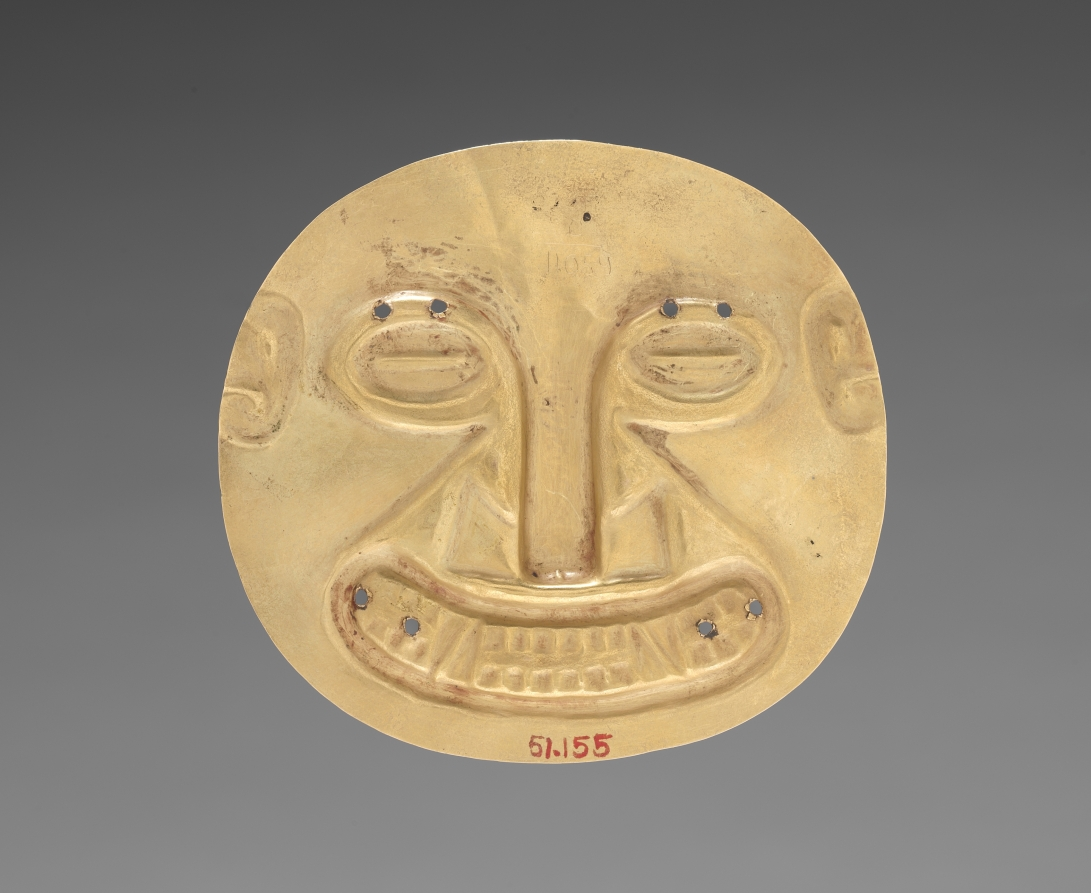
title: Ornament from Sitio Conte: Small Plaque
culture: Panama, Conte style, 5th - 10th century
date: c. 400–500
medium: hammered gold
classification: Metalwork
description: Harvard archaeologists excavated this ornament from Grave 32 at Sitio Conte, a cemetery famous for its lavish graves of powerful chieftains. The warm gleam of gold linked rulers with the sun’s creative force.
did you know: This disk was excavated from a burial containing three bodies.